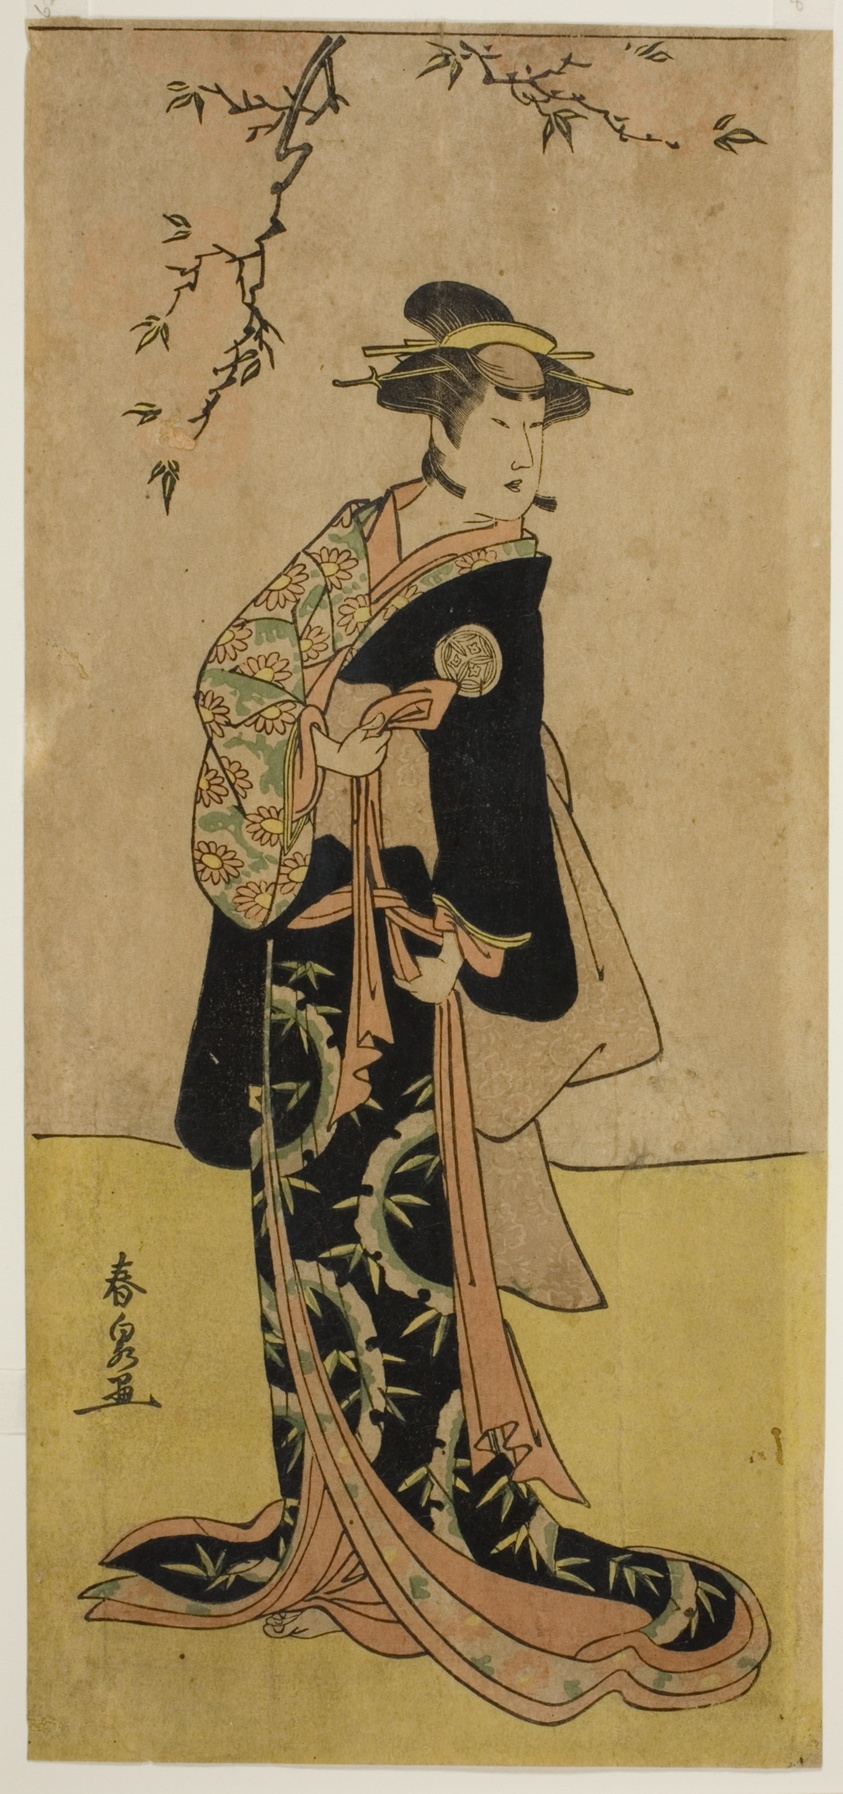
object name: Print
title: The Actor Yamashita Mangiku I as Lady Yuya (Yuya Gozen) (?) in the Play Heike Hyobanki (?), Performed at the Nakamura Theater (?) in the Seventh Month, 1789 (?)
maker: Katsukawa Shunsen (Japanese, active 1780s-early 1790s)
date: c. 1789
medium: Color woodblock print; hosoban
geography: Japan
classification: woodblock print; print; asian art